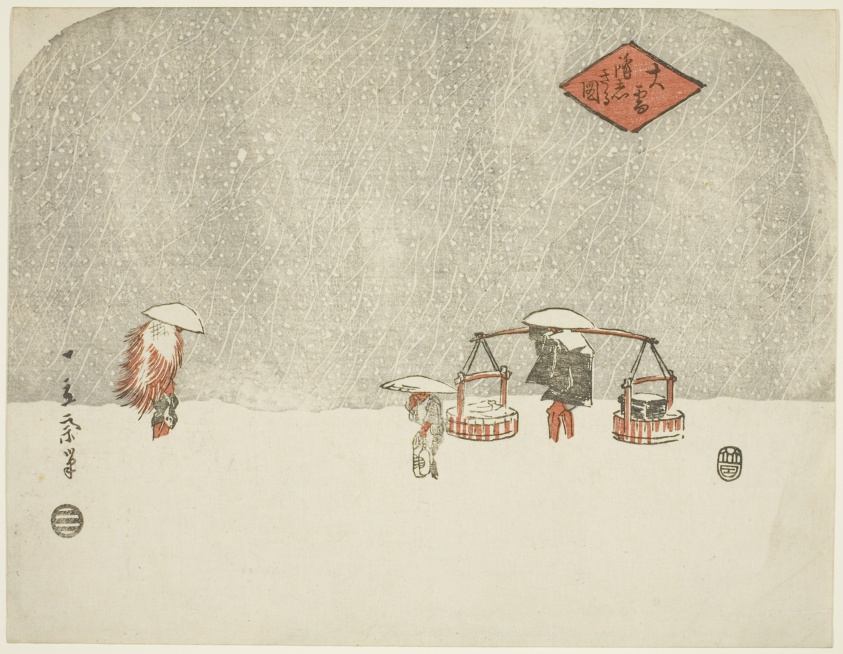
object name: Print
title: Heavy Snow (Oyuki furishikiru zu)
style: Japanese (culture or style)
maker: Utagawa Hiroshige 歌川 広重; Japanese, 1797–1858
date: mid–1840s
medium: Color woodblock print; uchiwa-e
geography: Japan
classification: woodblock print; print; asian art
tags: winter